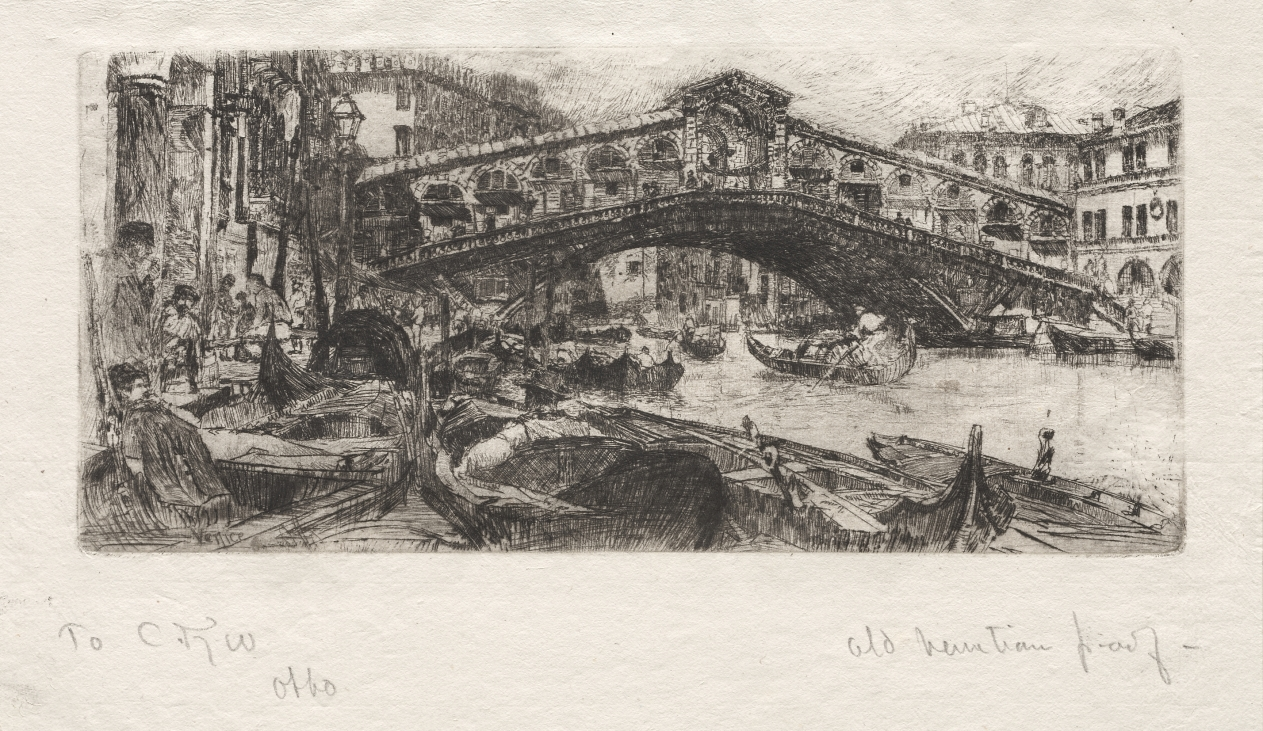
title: The Rialto, Venice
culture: America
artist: Otto H. Bacher (American, 1856–1909)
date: 1880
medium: etching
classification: Print